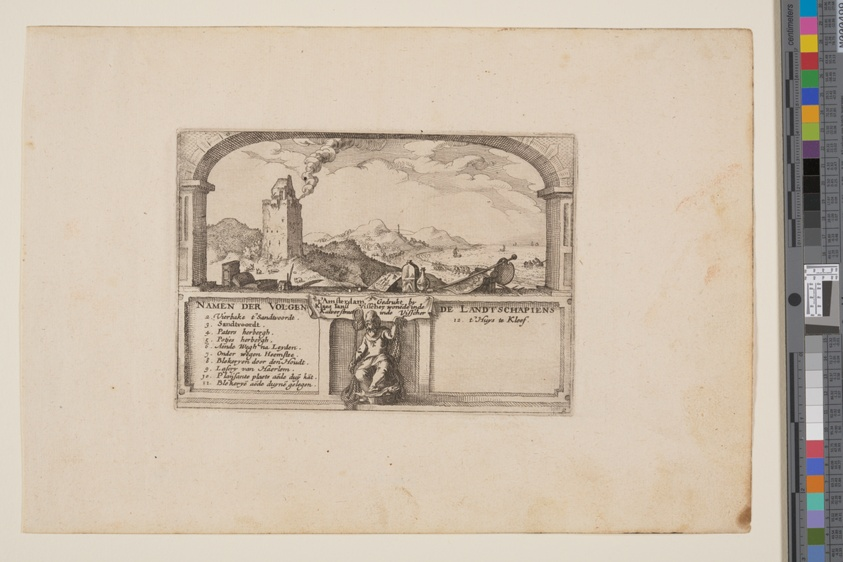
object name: Print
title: Beacon at Zandvoort, from Views in the Surroundings of Haarlem (Plaisante Plaetsen)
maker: Claes Jansz. Visscher (Netherlandish, c. 1550–c. 1612)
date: 1610/20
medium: Etching on ivory laid paper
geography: Netherlands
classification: print; paper; prints and drawing; etching